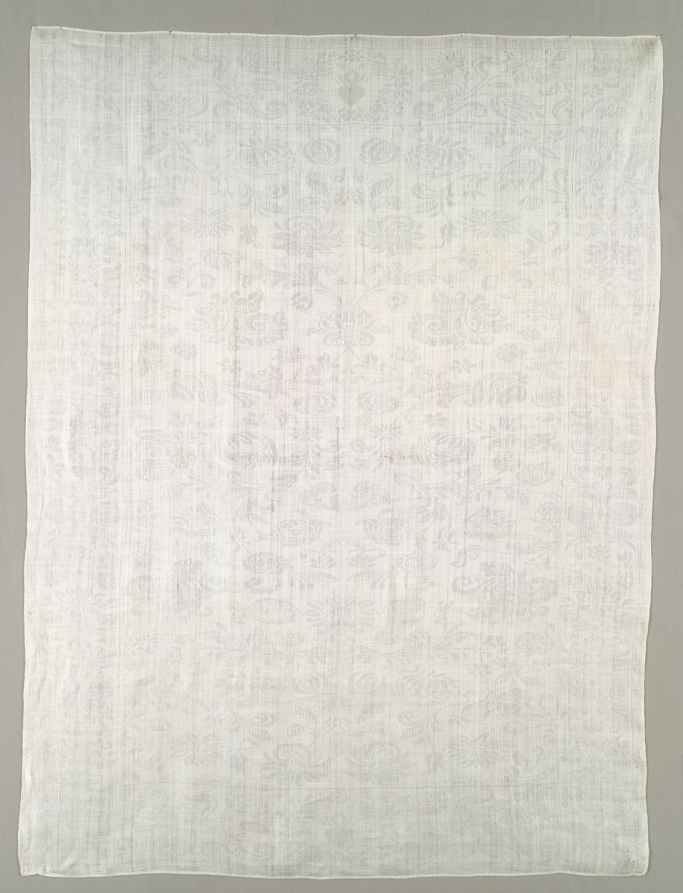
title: Napkin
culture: Flanders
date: c. 1675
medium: damask: linen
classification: Textile